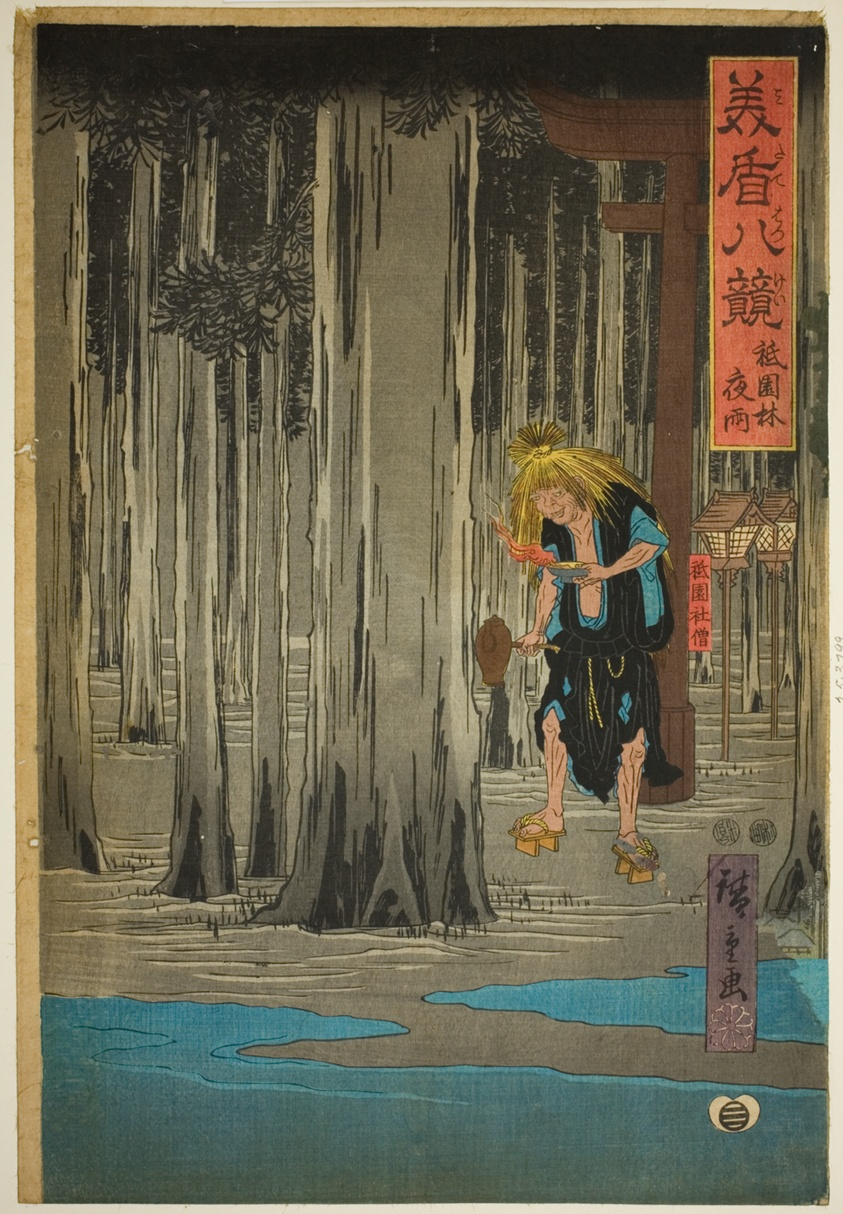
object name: Print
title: Night Rain in the Grove at Gion Shrine (Gion bayashi yau), from the series "Selected Eight Views (Mitate hakkei)"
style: Japanese (culture or style)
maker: Utagawa Hiroshige 歌川 広重; Japanese, 1797-1858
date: c. 1847/52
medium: Color woodblock print; right sheet of oban triptych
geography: Japan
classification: woodblock print; print; asian art